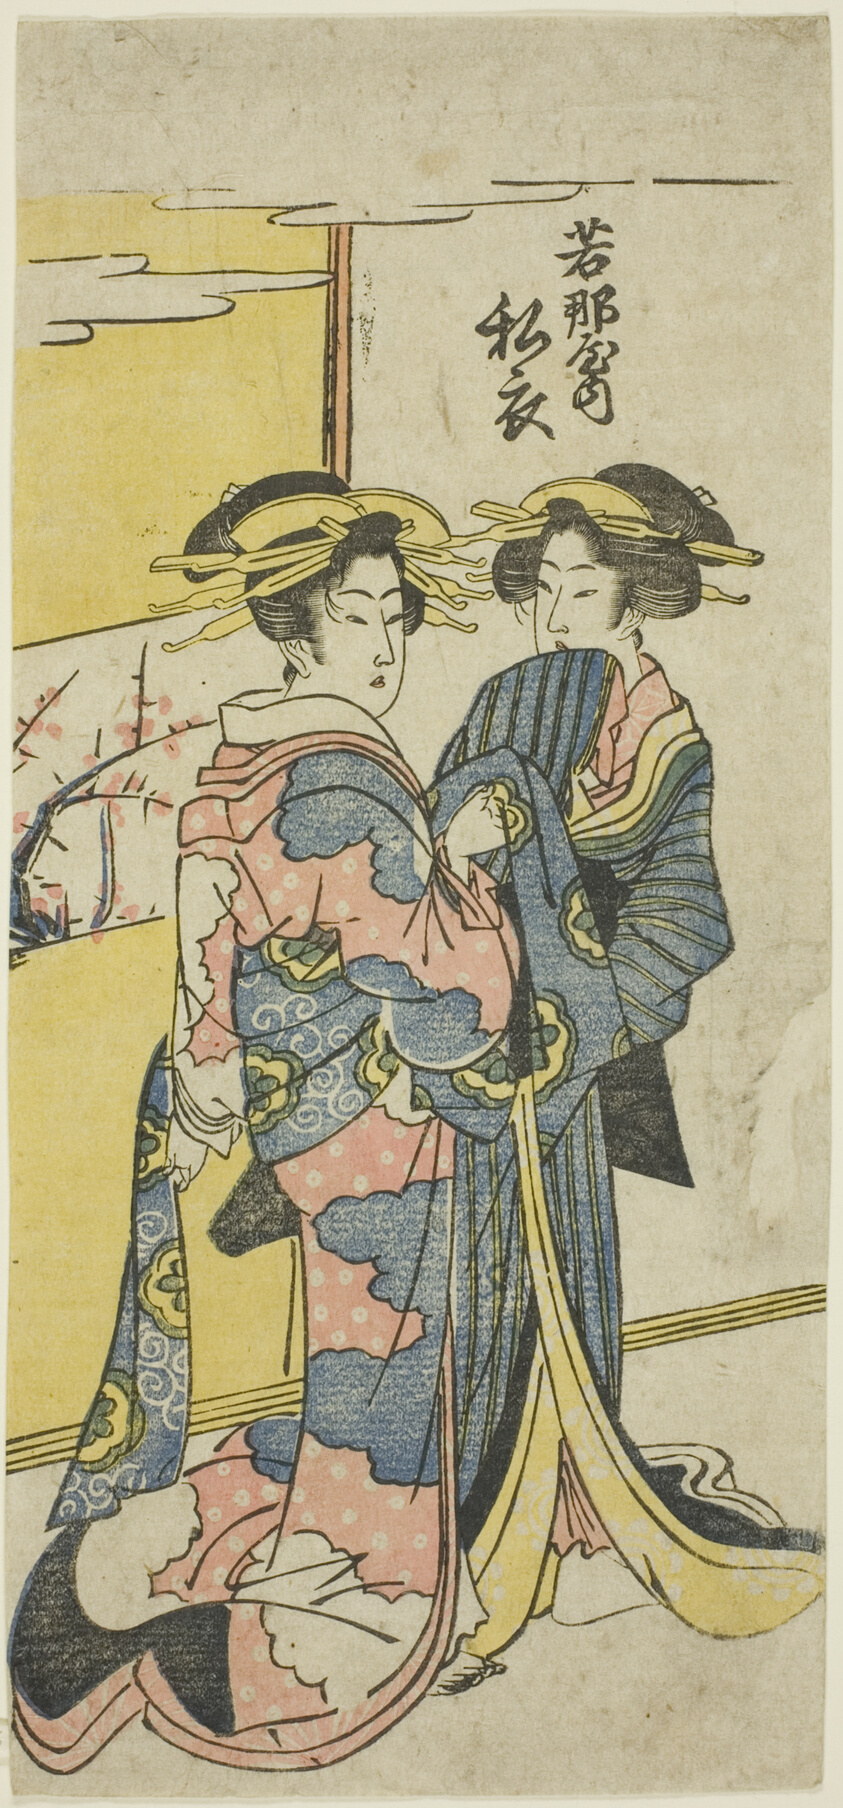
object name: Print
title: The Courtesan Nareginu of the Wakanaya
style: Japanese (culture or style)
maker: Attributed to Kikugawa Eishin (Hidenobu); Japanese, active c. 1804-30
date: c. 1804/30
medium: Color woodblock print; hosoban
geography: Japan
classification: print; asian art